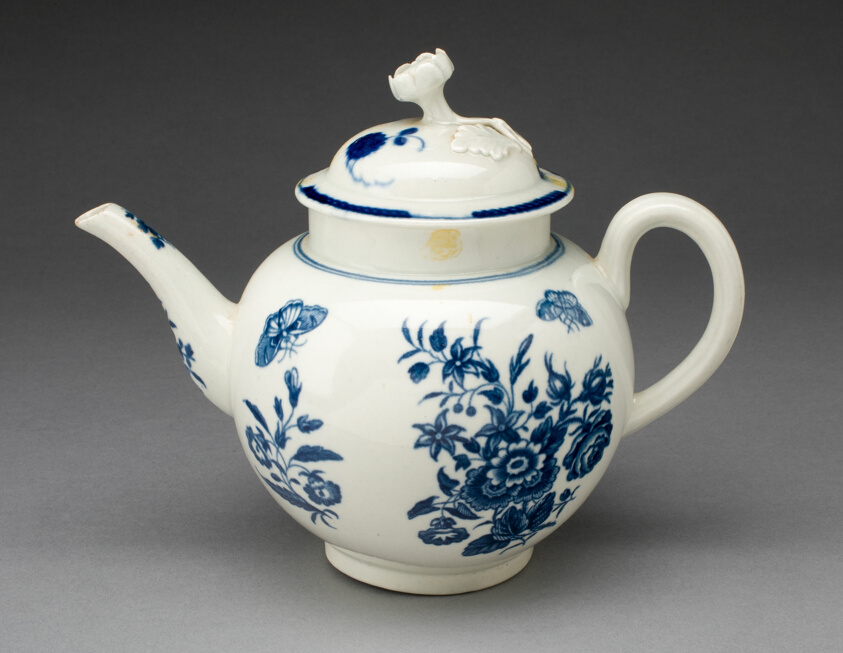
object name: Ceramics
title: Teapot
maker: Worcester Porcelain Factory (Warmstry House Period, 1751–1783); Worcester, England, founded 1751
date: c. 1770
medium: Soft-paste porcelain with underglaze blue decoration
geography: Worcester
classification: teapot; teaware; porcelain; european decorative arts; ceramics